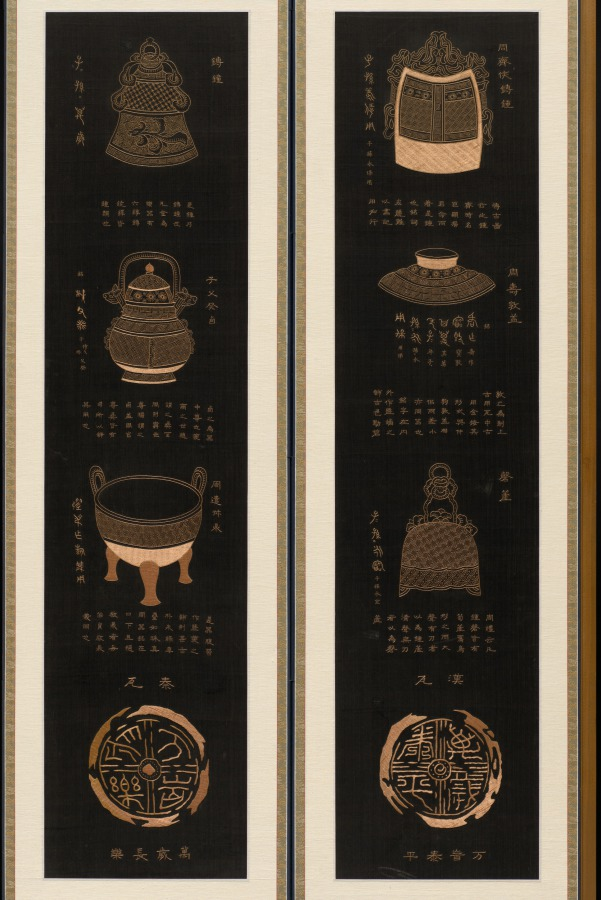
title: Ancient Chinese Bronzes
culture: Korea, Joseon dynasty (1392–1910)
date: late 1800s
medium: Ten-panel folding screen; embroidery, gold silk threads on black silk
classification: Textile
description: This embroidered folding screen depicts a set of bronze vessels. While the subject of bronze vessels is part of mainstream male elite culture, which centered on ancestral rituals, the written text that accompanies each bronze vessel expresses the idea of evoking good fortune and wishing for many children. The is perhaps related to the idea that those who diligently perform rituals for the spirit of ancestors could have all their aspirations realized.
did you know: The written text that accompanies each bronze vessel depicted in this embroidered screen expresses the idea of evoking good fortune and wishing for many children.